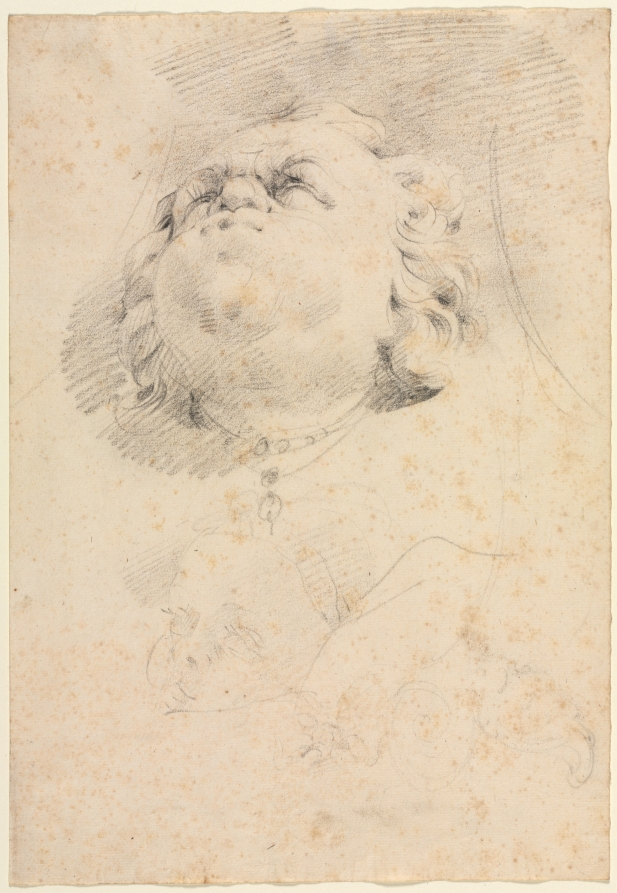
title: Sketch of a Heads after Giambologna's Neptune Fountain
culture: France, 17th century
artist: attributed to Christophe Veyrier (French, 1637–1689)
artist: attributed to Pierre Puget (French, 1620–1694)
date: c. 1654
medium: black chalk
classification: Drawing